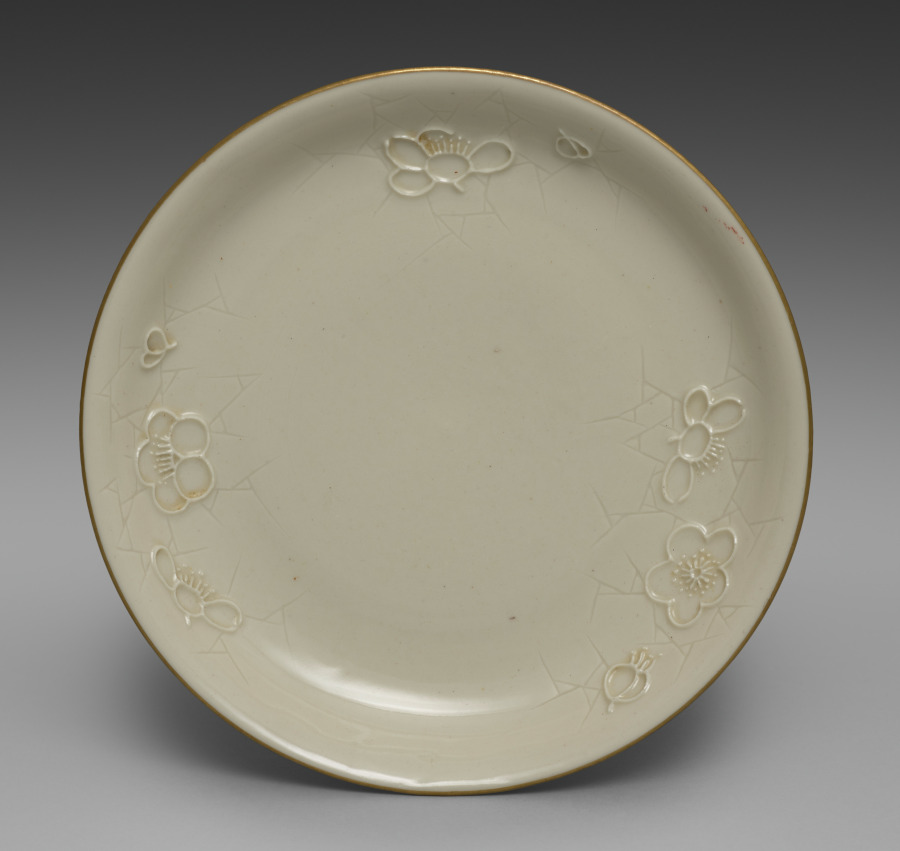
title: Medium-sized Dish from Dining Set with Plum Blossoms and Cracked-Ice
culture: Japan, Meiji period (1868–1912)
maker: Seifū Yohei II (Japanese, 1844–1878)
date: c. 1875–78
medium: Porcelain with molded designs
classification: Ceramic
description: Each item in this set has a delicate low-relief design of flowering plum branches over scattered, intersecting lines meant to resemble the cracked-ice surface of a frozen body of water and is signed on the base in gold pigment. While Yohei II produced many fine works in underglaze blue, like those produced by Kiyomizu Shichibei, he also made works in quite different styles later in his career, from the early 1870 s. In 1873, he was appointed purveyor to the Industrial Center of Kyoto Prefecture, a designation associated with Kyoto’s efforts to reach an international market through the port of Kobe; and from 1875 until his death, he was involved in national-level projects to present Japanese ceramics across the world. It was during this period that Yohei III was apprenticed to Yohei II, and it has been suggested that this set may in fact be an early example of Yohei III’s work, which he signed with his teacher’s name. Decorated with flowers resembling Japanese textile motifs, the set calls to mind the design of Yohei II’s pair of vases with plum blossoms in the Victoria and Albert Museum. Here, the elaborate trees created for a formal public exhibition setting have been translated into the approachable blossoms of the genteel domestic environment. While the designs are consistent across the pieces, each raised flower petal and pistil and each incised line in the ice was done by hand, so the cups, bowls, and dishes are similar yet unique. The bottoms of two boxes once identified the set’s owner, but the information has been deliberately obscured with black ink. However, inscriptions still visible appear to indicate two occasions, once at the end of July 1886 , and once again in June 1916 , when parts of the set were requested from Hokura in Niigata Prefecture. The location corresponds to a neighborhood in the present-day city of Jōetsu. The surname Tsuji 辻 also appears on a paper tag affixed to one of the box cloths. Future research may possibly reveal more about their provenance. A vase by Yohei III in a private collection combines the formal grandeur of the Yohei II vases in the Victoria and Albert Museum with the gentler design of this dining set, placing flowering plum trees against soft, scalloped-edge clouds resembling those in golden screens.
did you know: The dining wares have a creamy white coloration that the four boxes containing them identify as Korean in style.